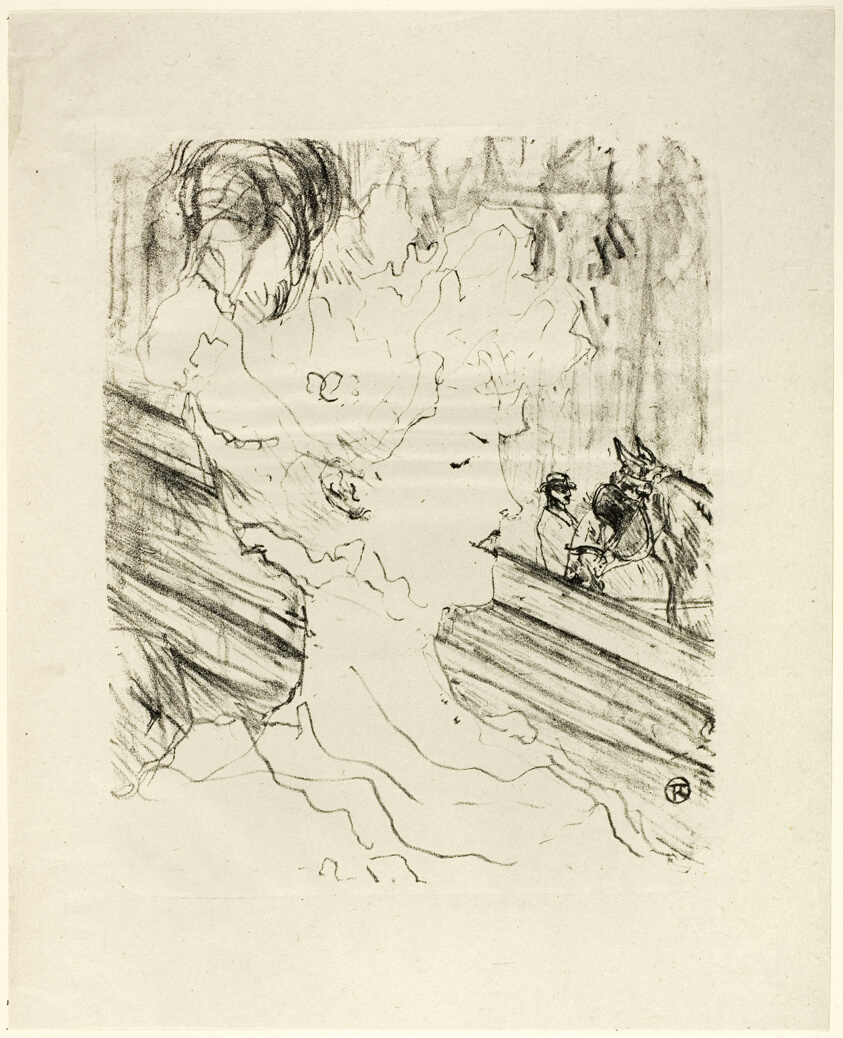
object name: Print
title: Emilienne d'Alençon, from Treize Lithographies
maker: Henri de Toulouse-Lautrec (French, 1864-1901)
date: 1898, published before 1906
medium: Lithograph on ivory laid paper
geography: France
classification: lithograph; print; prints and drawing